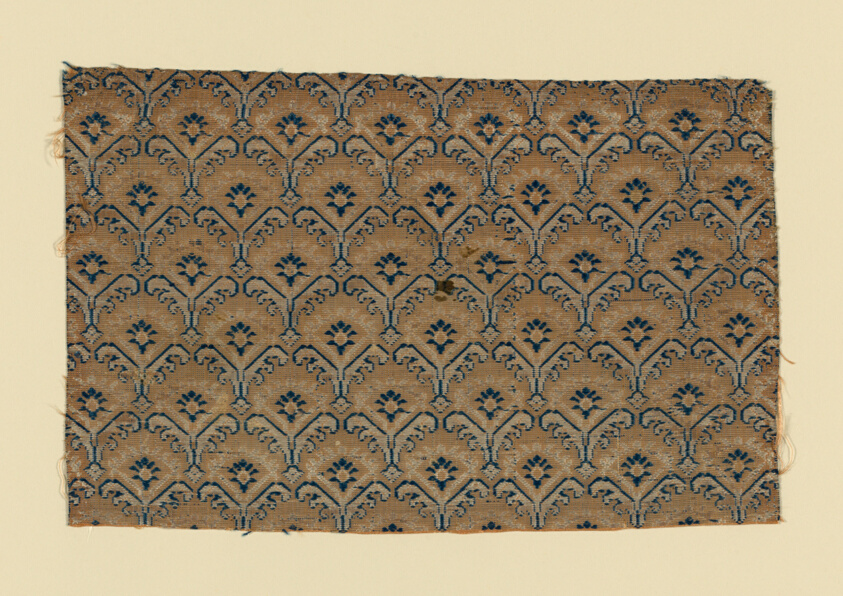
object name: Textile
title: Fragment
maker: Italy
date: 1650/1700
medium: Silk, plain weave with self-patterning ground wefts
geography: Italy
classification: textile; weaving